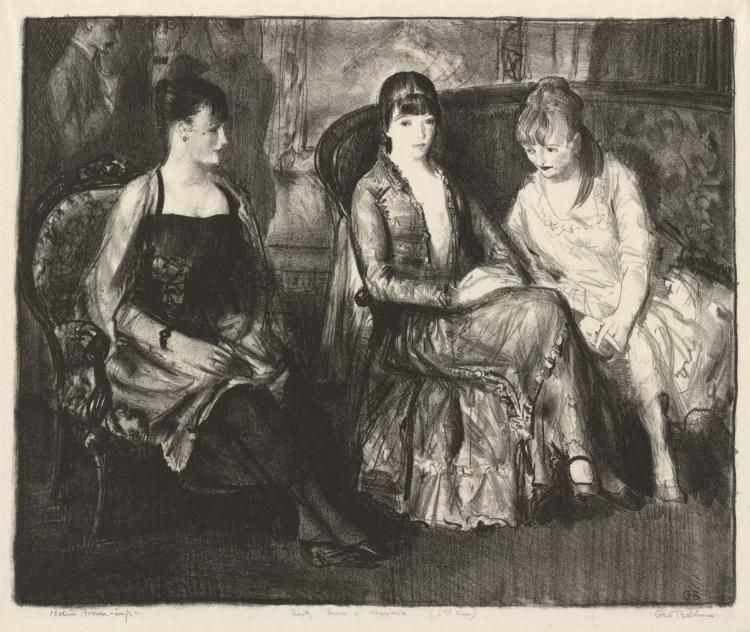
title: Marjorie, Emma and Elsie, Second Stone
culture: America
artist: George Bellows (American, 1882–1925)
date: 1921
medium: lithograph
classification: Print